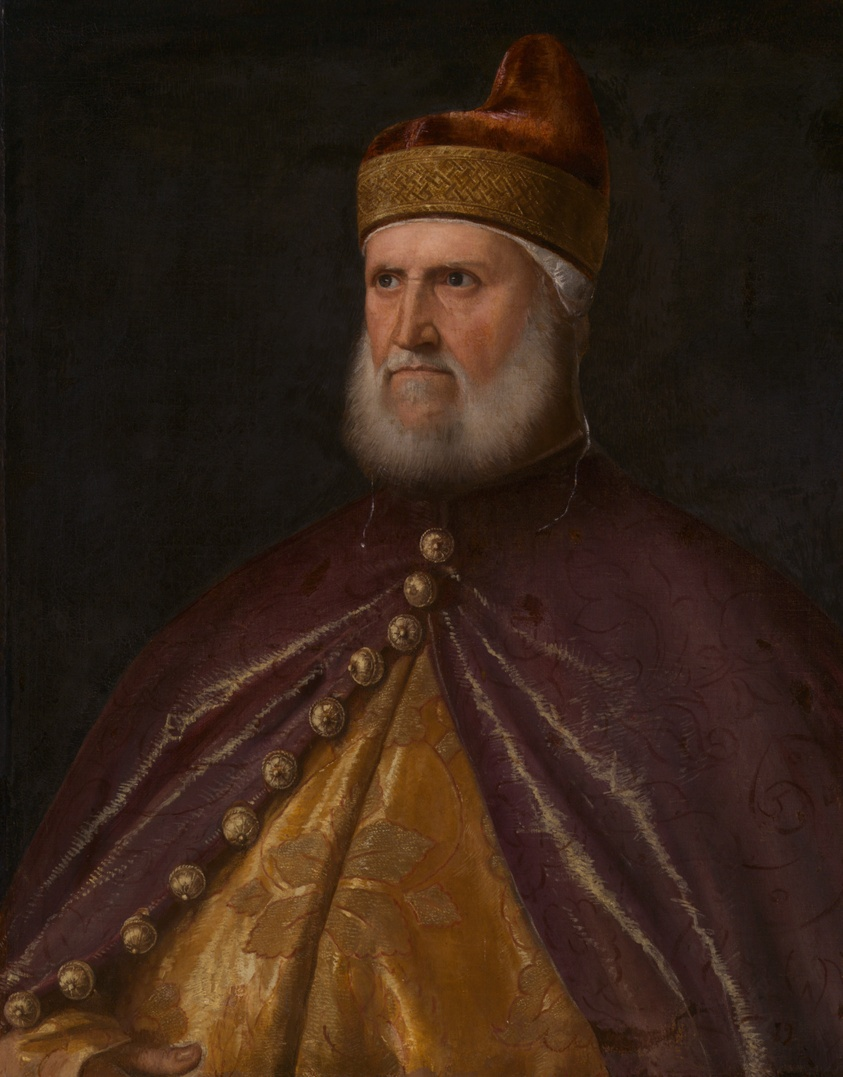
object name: Painting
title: Doge Andrea Gritti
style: sixteenth century, Renaissance, 16th Century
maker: Workshop of Titian (Tiziano Vecelli; Italian, 1477-1576)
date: 1530/1540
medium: Oil on canvas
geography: Italy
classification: oil on canvas; portrait; paint; oil paintings (visual works); Italian; painting; european painting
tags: portrait, portraits: male subject, portraits, man, uniforms, official, doge, bearded man, 16th century